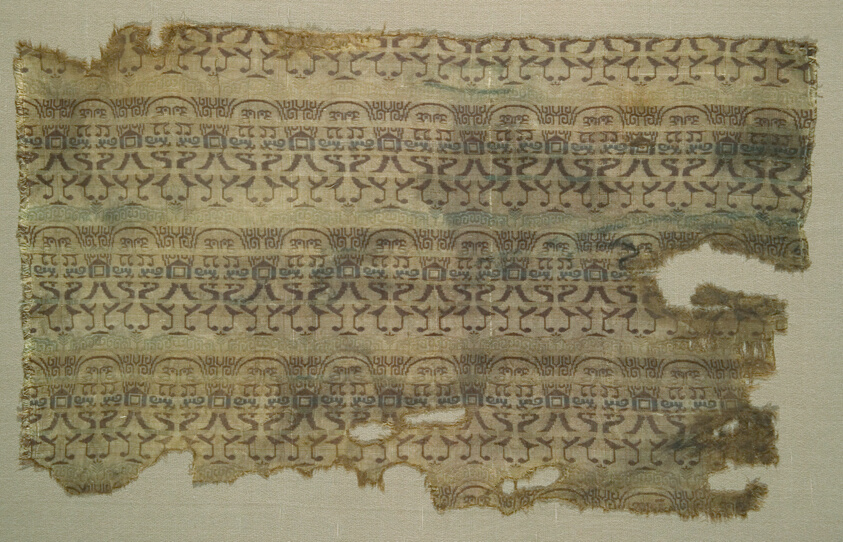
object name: Textile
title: Fragment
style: sui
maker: Northwest China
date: Sui dynasty (518–618), 5th/6th century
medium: Silk, complementary warp plain weave with inner wefts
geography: China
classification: textile; silk; weaving